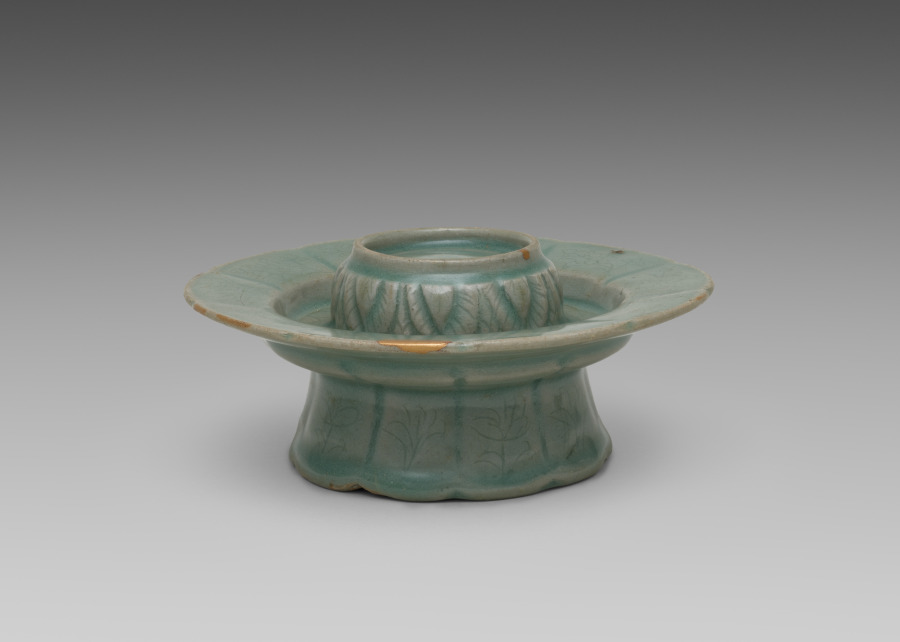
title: Floral-shaped Cup Stand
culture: Korea, Goryeo dynasty (918–1392)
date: 1100s-1200s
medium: celadon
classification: Ceramic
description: As early as the seventh century, the practice of drinking tea became an important part of elite culture in Korea. In enjoying teas, elites commissioned a variety of types of utensils and vessels including this delicate-looking cup stand, not only to make their tea-drinking experience more exciting, but also to show their refined taste.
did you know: According to a historical record, the cultivation of tea in Korea was initiated with green tea plant seeds from China by royal order in 828.